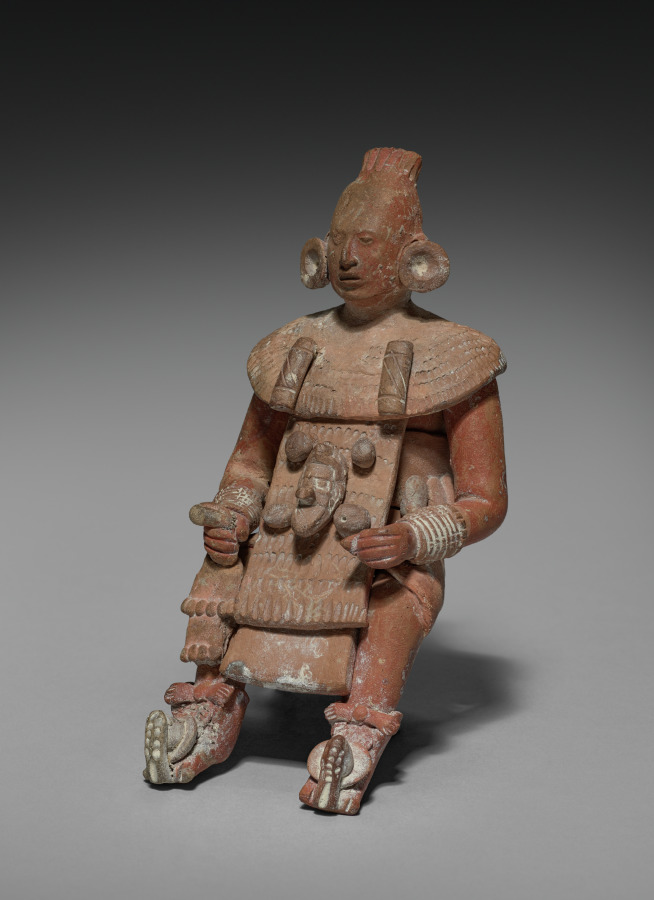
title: Seated Lord with Removable Headdress: Figure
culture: Mesoamerica, Maya, probably Jaina Island, Late Classical period, 7th-9th century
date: 600–800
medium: ceramic and slip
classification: Ceramic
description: The major Maya grave offerings on Jaina Island were ceramic figurines that depict deities and humans in a variety of roles. The seated figure represents a male, perhaps another warrior, who wears a huge zoomorphic headdress. A skeletal face with articulated jaw descends from the headdress to fit as a mask over the figure’s face.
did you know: It is estimated that some 20,000 people were buried on the tiny island of Jaina over a 500-year period.